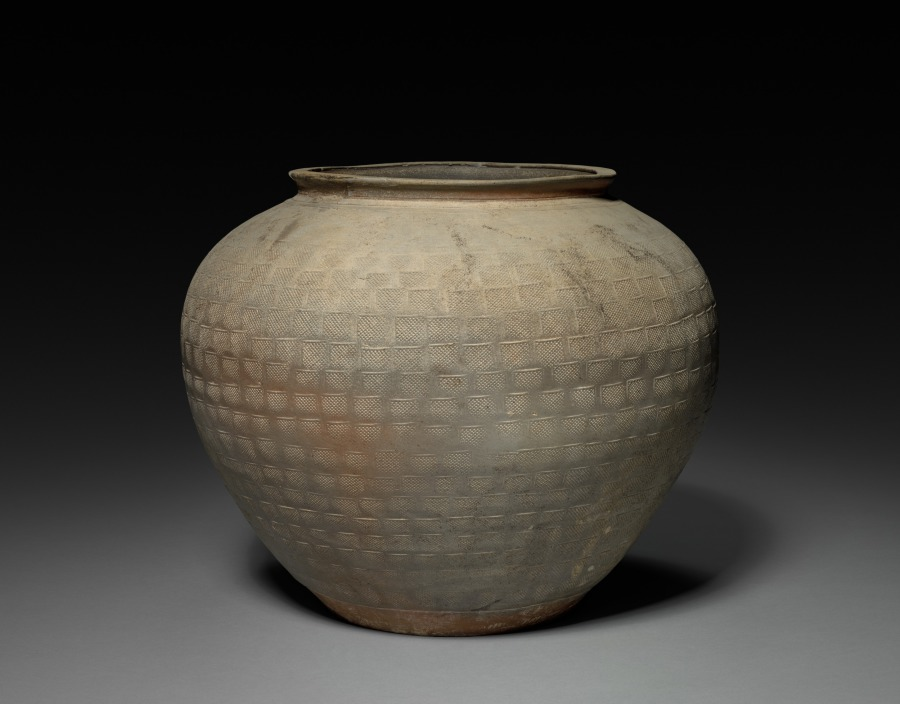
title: Jar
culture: China, Zhejiang province, Eastern Han dynasty (25–220 CE)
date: 25–220 CE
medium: stoneware with impressed decoration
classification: Ceramic